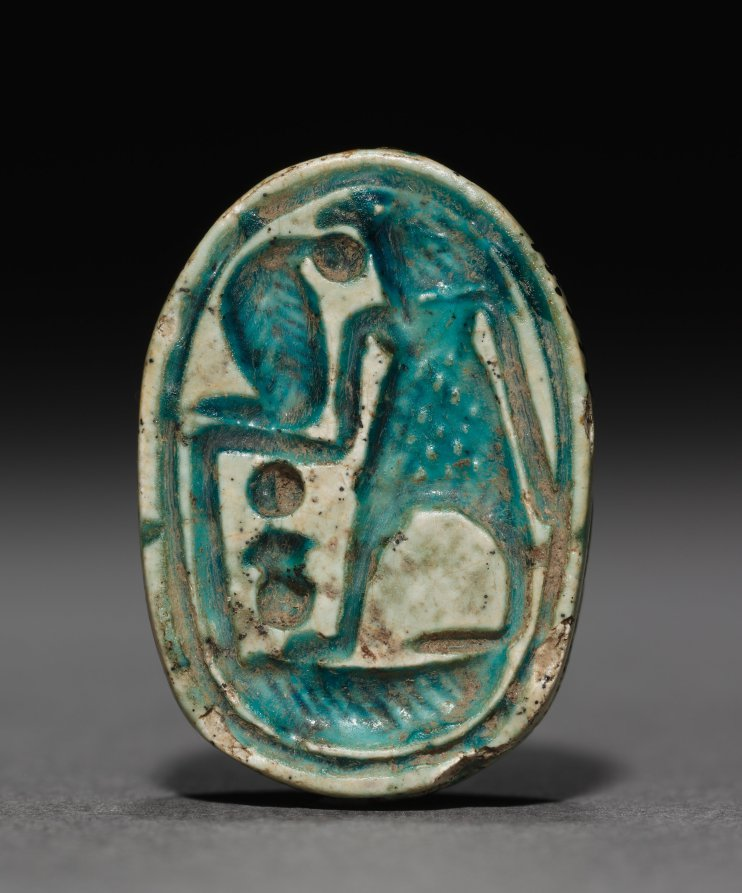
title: Scarab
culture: Egypt, Second Intermediate period (1648–1540 BCE)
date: 1648–1540 BCE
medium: turquoise-glazed steatite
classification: Scarabs